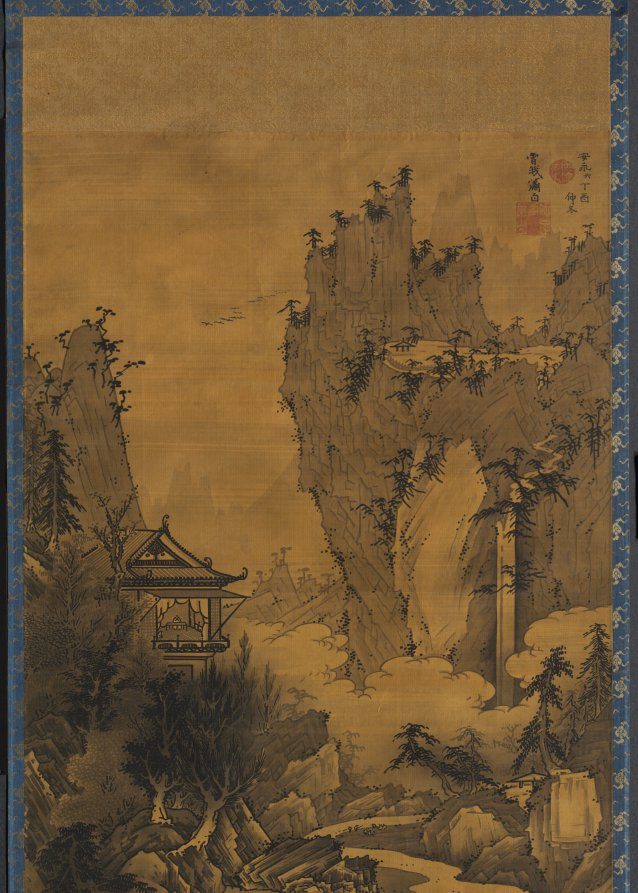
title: Orchid Pavilion Gathering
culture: Japan, Edo period (1615–1868)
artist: Soga Shōhaku (Japanese, 1730–1781)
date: 1777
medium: hanging scroll; ink on silk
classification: Painting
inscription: Inscribed upper right: Sixth year of An'ei (1777) mid-winter, Soga Shohaku Seal: Dasokken Shohaku Seal: Unread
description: This painting depicts a famous gathering that took place in China in AD 353 to celebrate the Spring Purification Festival, also known as the Double Third Festival, as it takes place on the third day of the third lunar month. The host invited everyone to the Orchid Pavilion to compose poetry and drink wine. Guests floated wine cups down a nearby creek, and where they landed, people had to drink the wine and compose a poem.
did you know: The Buddhist temple Bairinji in Kurume City, Fukuoka prefecture, Japan, and the National Gallery of Victoria in Melbourne, Australia, own compositions by the same artist on the same theme.